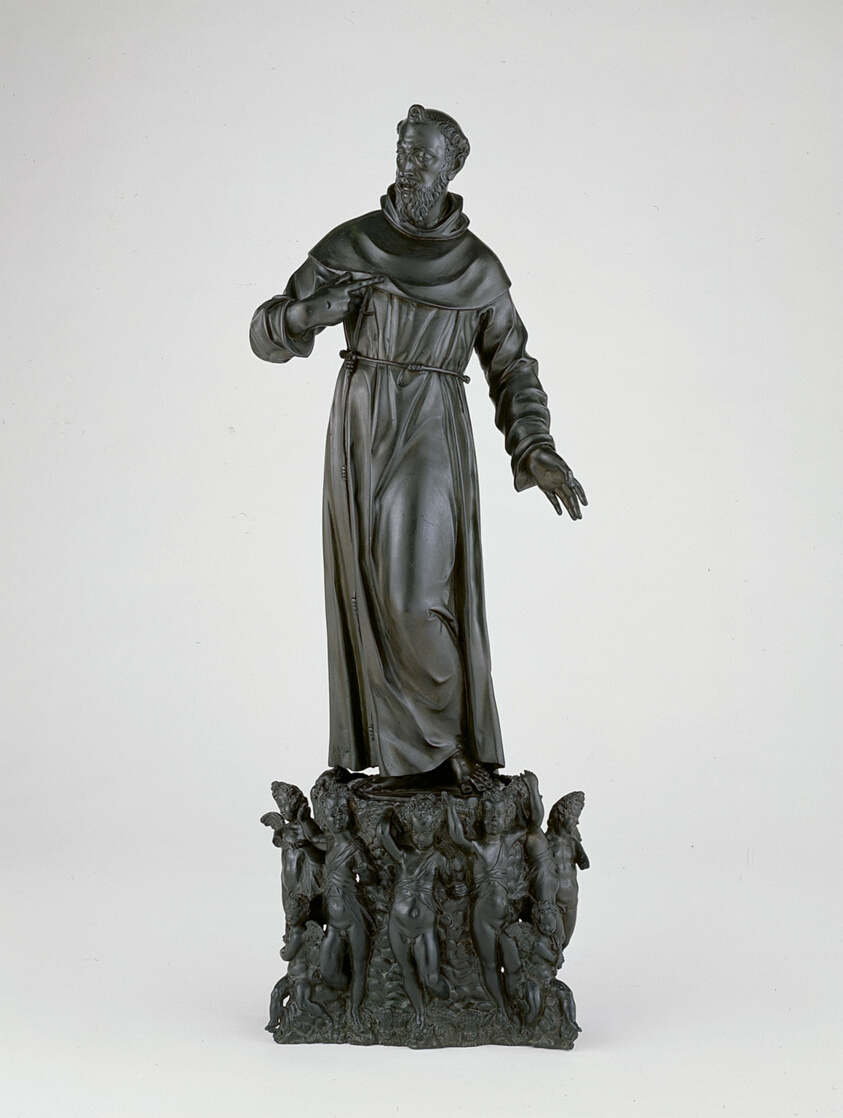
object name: Sculpture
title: Saint Francis of Assisi; Base with Putti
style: 17th Century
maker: Attributed to Nicolo Roccatagliata (Italian, 1593–1636)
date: 1600/20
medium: Bronze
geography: Italy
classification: sculpture; bronze; figure; Italian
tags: Saint Francis, angels, Christian subjects, Christianity, figure, putti, religion, religious, religious figures, saints, stigmata